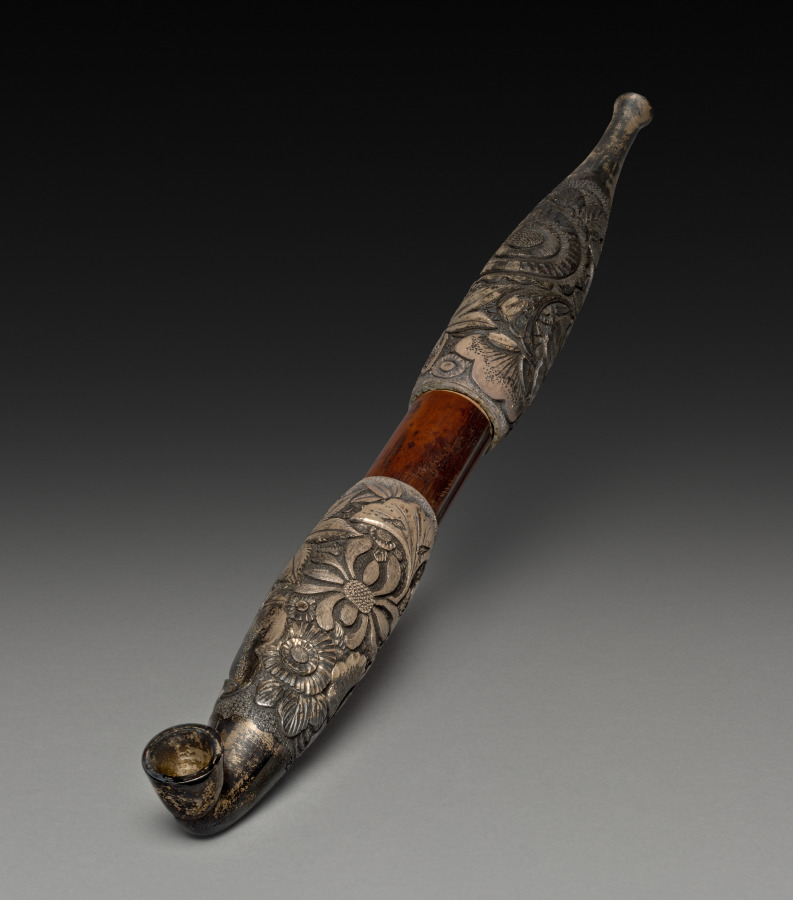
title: Tobacco Pipe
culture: Japan, Edo period (1615–1868)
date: early to mid-1800s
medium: bamboo and silver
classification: Miscellaneous